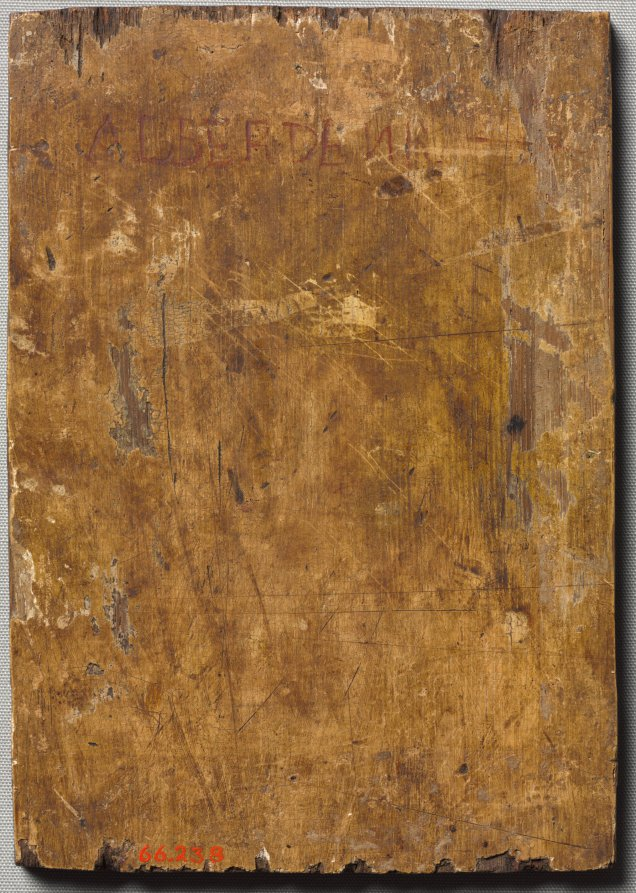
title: John the Baptist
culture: Flanders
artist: Robert Campin (Netherlandish, 1375/79–1444)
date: c. 1410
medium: oil on oak panel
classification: Painting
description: According to tradition, John the Baptist wears a hair shirt under a white cloth, associated with newly baptized Christians. The flag bearing a red cross symbolizes resurrection. In marked contrast, the background features a lavish gold-patterned silk. The display of such luxurious fabrics continues an ancient tradition of using the finest objects in the worship of God. This painting has been cut down along the lower edge and would have originally shown a full-length image of the saint. It was probably the right wing of a triptych, with John the Baptist gazing upon a central image of the Virgin and Child. Campin first settled in Tournai around 1405-6 as a free master of the guild of painters, and he bought citizenship there in 1410, which suggests he was born elsewhere. Although heavily indebted to contemporary masters of manuscript illumination, Campin displayed greater powers of realistic observation than any other painter before him. He was one of the first artists to experiment with the use of oil-based colors, in lieu of egg-based tempera, to achieve the brilliant color typical of this period.